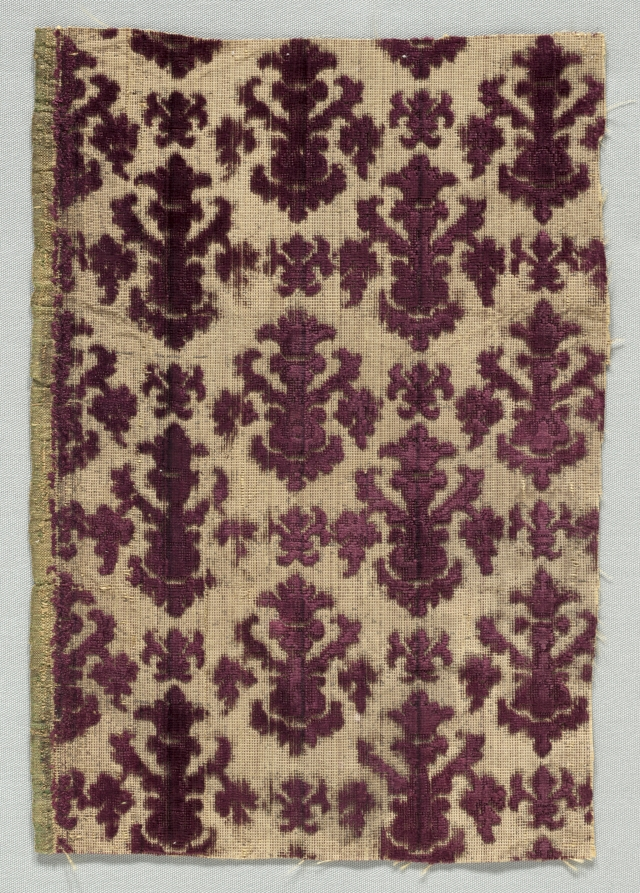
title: Velvet Fragment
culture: Italy, 17th century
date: 1600s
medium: velvet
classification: Velvet